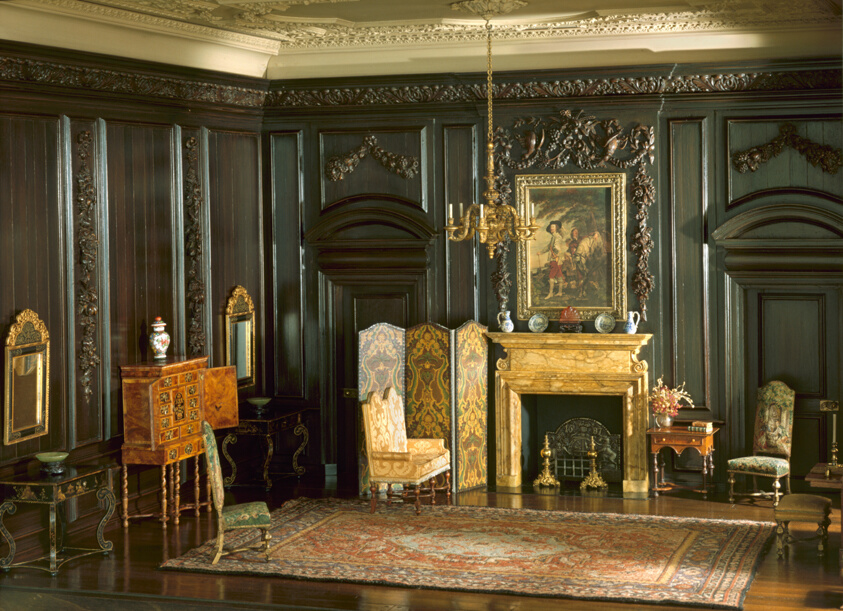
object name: Miniature room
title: E-4: English Drawing Room of the Late Jacobean Period, 1680-1702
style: jacobean, stuart, european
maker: Designed by Narcissa Niblack Thorne; American, 1882-1966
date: c. 1937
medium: Miniature room, mixed media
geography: United States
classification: miniature; thorne rooms